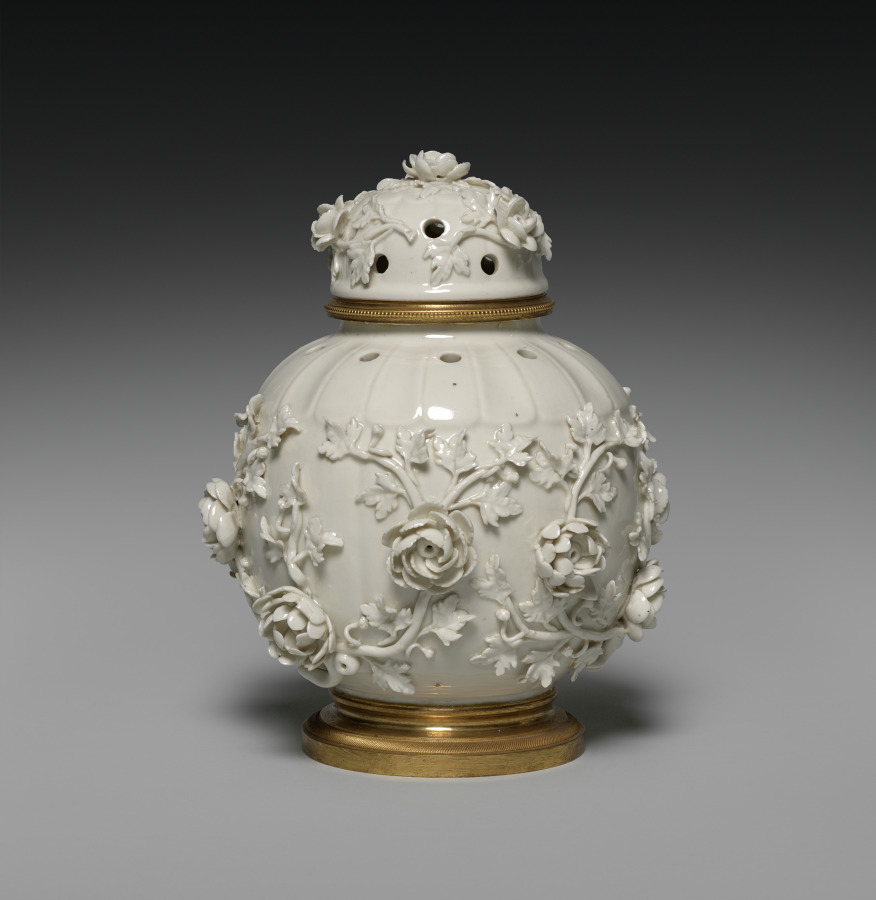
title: Potpourri Vase with Cover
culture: France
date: c. 1860–80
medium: blanc-de-chine porcelain; gilt bronze mount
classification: Ceramic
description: This vase was likely made by the celebrated Parisian ceramics firm of Edmé Samson (1810–91). To cater to the resurgence in taste for 18th-century designs, the Samson firm specialized in making reproductions of rare 18th-century European porcelains, especially those from firms that had already copied Chinese porcelains. In this case, this vase's design is taken from models produced by the Saint-Cloud factory in the 1750s after earlier Qing dynasty Chinese ceramics. However, the telltale sign that this vase is made by Samson and not Saint-Cloud is that the original would have been made from a soft-paste porcelain (fired at a lower temperature), while this example is made of hard-paste porcelain (fired at the highest temperature).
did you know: Potpourri vases always have holes in the top to let the scent of dried spices and flowers contained within freshen the air around them.